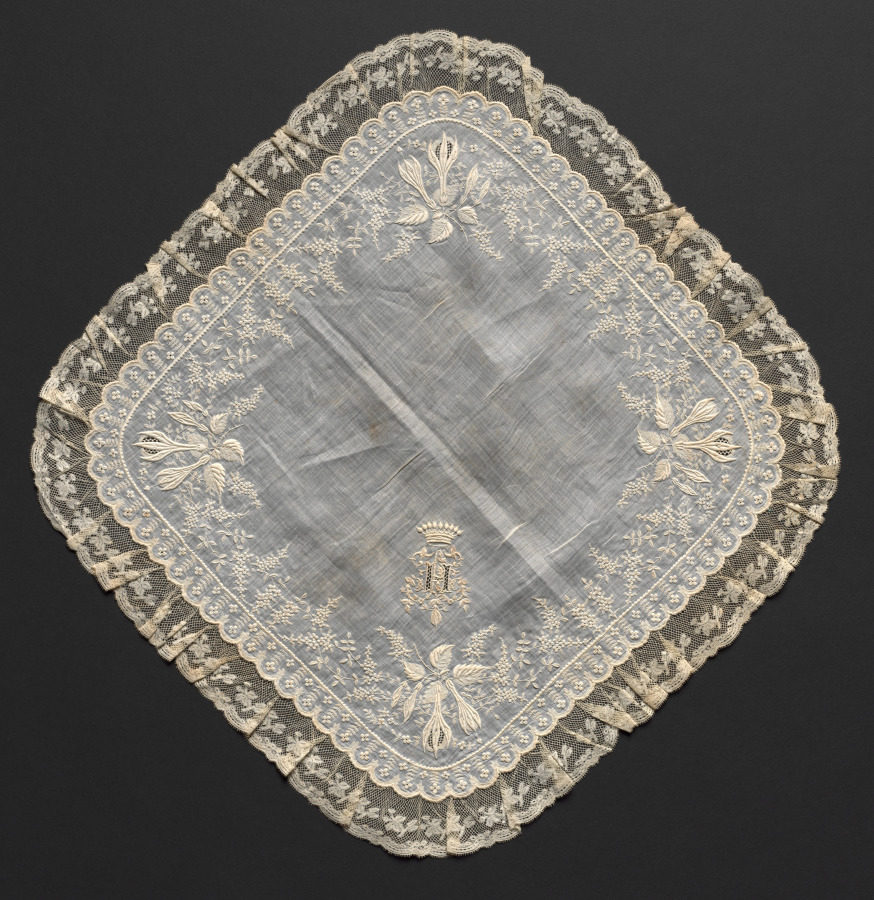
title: Lace Handkerchief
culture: France or Flanders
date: 1800s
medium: Plain weave linen center with bobbin lace (Valenciennes lace) edging and embroidery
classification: Embroidery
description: The initial H is embroidered in one corner of this handkerchief, along with a nine-point coronet around it.